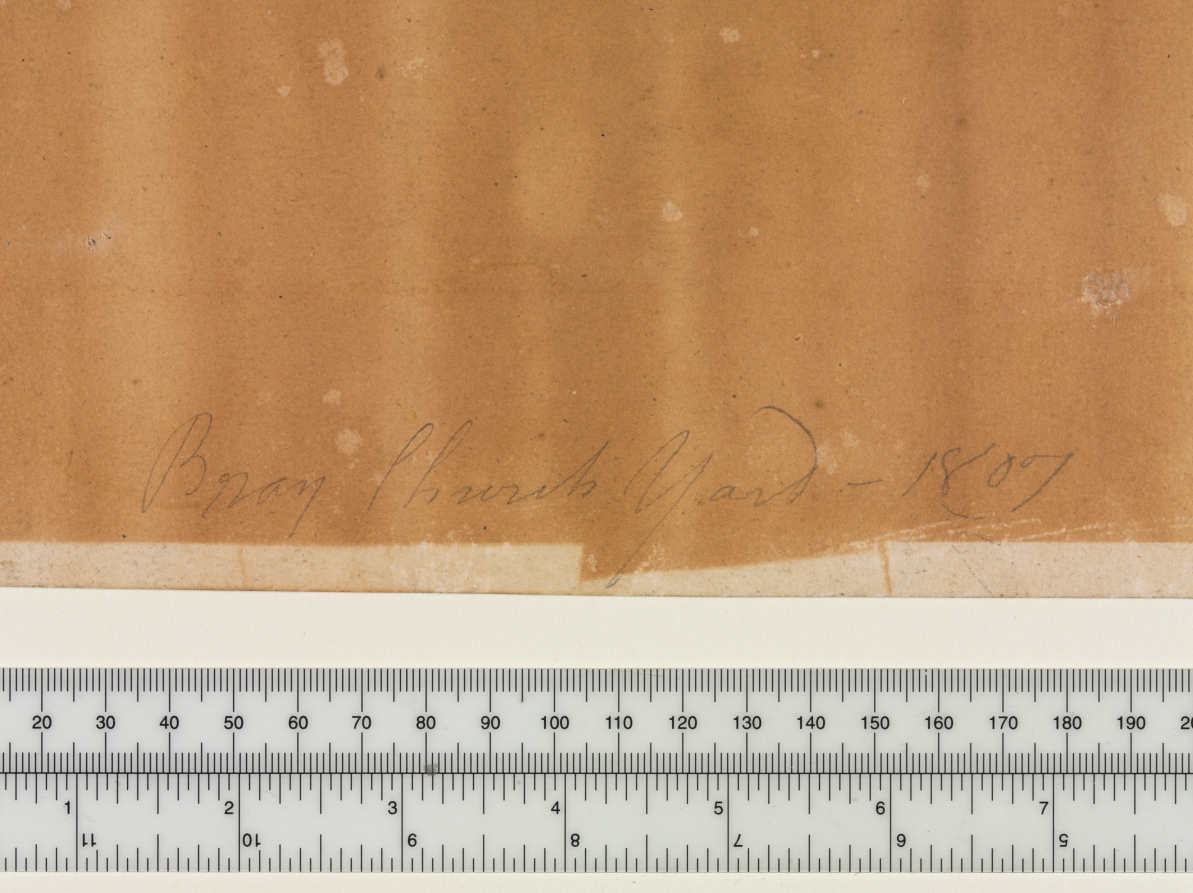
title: Bray Church Yard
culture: England, 19th century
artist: John Varley (British, 1778–1842)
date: 1807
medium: watercolor and graphite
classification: Drawing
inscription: inscribed, in graphite, on verso, at lower left: BrayChurch Yard - 1807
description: The inscription on the reverse of this drawing, "Bray Church Yard-1807," likely refers to St. Michael’s, the parish church in the village of Bray on the banks of the Thames in the county of Berkshire. The banks of the lower Thames Valley provided the subject matter for many of John Varley’s early watercolors. His pursuit of the picturesque led the artist to turn his back on London and its connotations of commerce and industry, focusing instead on the rural aspects of the scene.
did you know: Although rare, John Varley's early watercolors are considered his most inspired work.